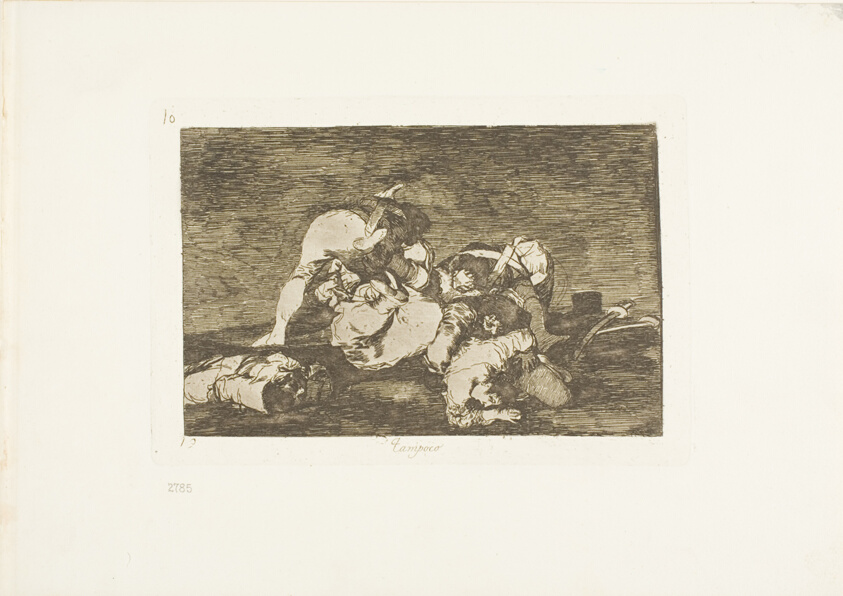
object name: Print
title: Neither do these, plate ten from The Disasters of War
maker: Francisco José de Goya y Lucientes (Spanish, 1746-1828)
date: 1810/15, published 1863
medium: Etching and burin on ivory wove paper with gilt edges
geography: Spain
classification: etching; print; prints and drawing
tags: war